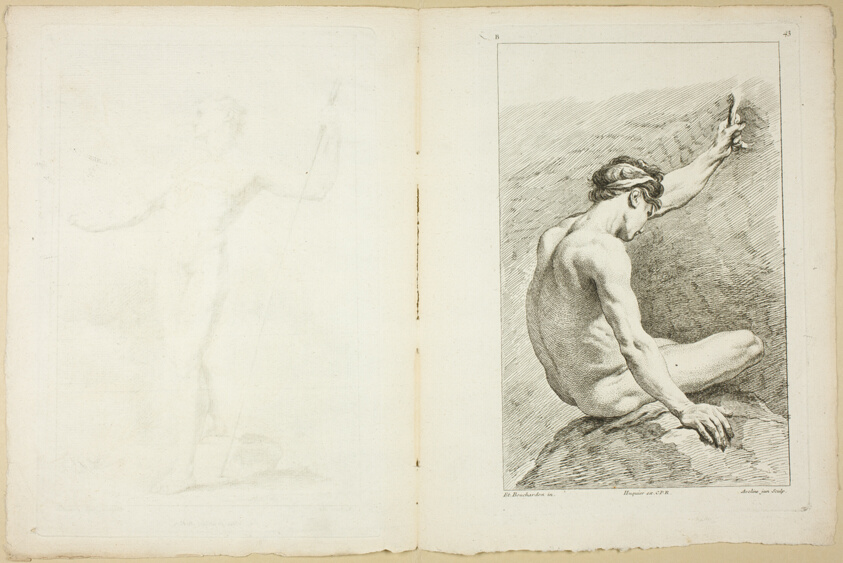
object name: Print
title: Page 42 and Page 43, from Seconde Livre de Figures d’Académies Gravées en Partie par les Professeurs de l’Académie Royale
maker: Gabriel Huquier (French, 1695-1772); after Charles-Joseph Natoire (French, 1700-1777); Pierre Aveline (French, 1702-1760); after Edme Bouchardon (French, 1698-1762); printed by Gabriel Huquier (French, 1695-1772); published by Charles-Antoine Jombert (French, 1712-1784)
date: published 1745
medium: Etching on ivory laid paper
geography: France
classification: etching; print; prints and drawing